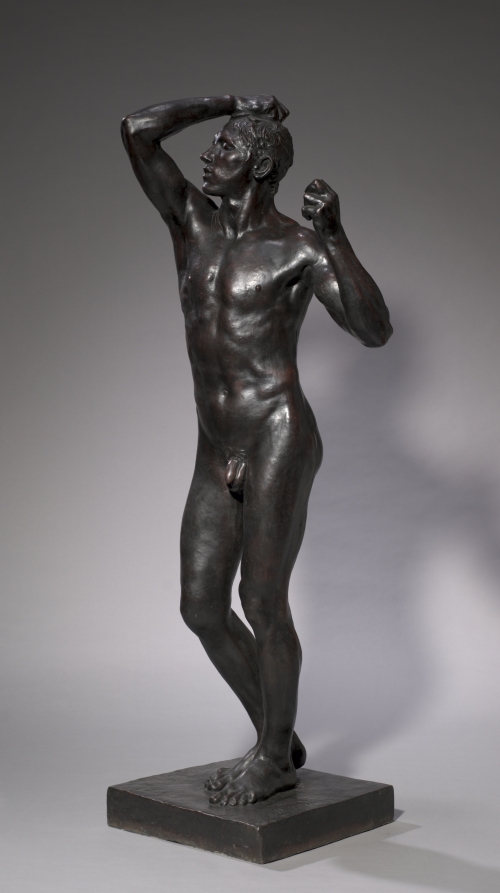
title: The Age of Bronze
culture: France, 19th century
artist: Auguste Rodin (French, 1840–1917)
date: 1875–76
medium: bronze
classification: Sculpture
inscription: inscribed top of base to right: Rodin; inscribed back of base: A. RUDIER Fondeur Paris.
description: Rodin’s earliest surviving life-size sculpture, The Age of Bronze is an enigmatic and provocative image of a man awakening to new consciousness. The figure originally held a spear in one hand; by removing the weapon, Rodin stripped the sculpture of narrative symbols and focused on the sensuality and psychological power of the male nude. Contemporaries found the figure so realistic they falsely accused Rodin of making a cast from a living person. Museum trustee Ralph King commissioned this cast from the artist in 1916 with the intention of donating it to the museum. Rodin personally supervised the exceptionally fine casting and finished it with his favorite patina, a deep reddish tone he called “crushed grape.”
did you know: The sculpture suggests the heroism and suffering of his countrymen during the Franco-Prussian War of 1870–71. This life-sized male figure was modeled after a Belgium soldier named August Neyt.